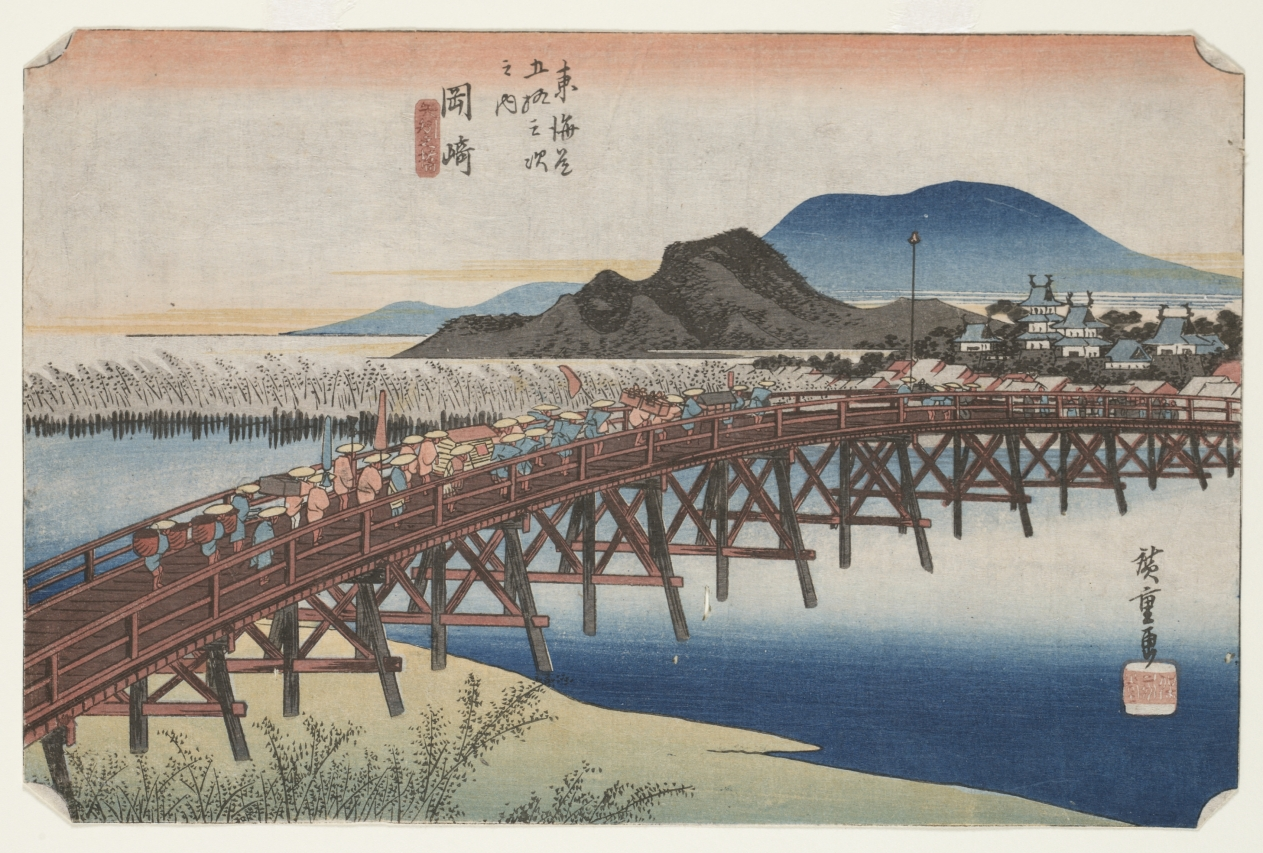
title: Yahagi Bridge at Okazaki (Station 39), From the series Fifty-Three Stations of the Tokaido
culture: Japan, Edo period (1615–1868)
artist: Utagawa Hiroshige (Japanese, 1797–1858)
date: 1833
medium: color woodblock print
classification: Print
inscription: Signature: Hiroshige ga Publisher: Takenouchi Magohachi (Hoeido)